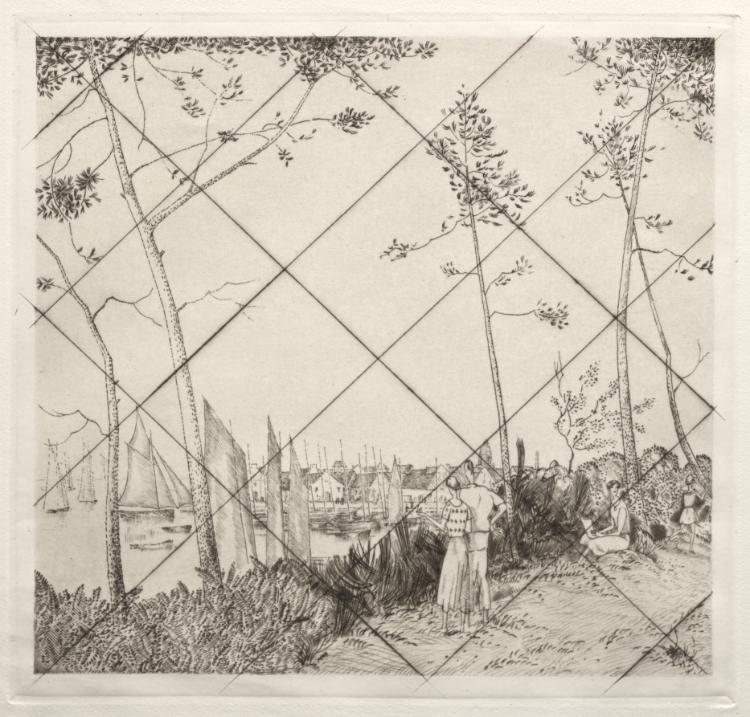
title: La Promenade sur le Port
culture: France, 20th century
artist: Jean-Émile Laboureur (French, 1877–1943)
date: 1935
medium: etching and line engraving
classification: Print